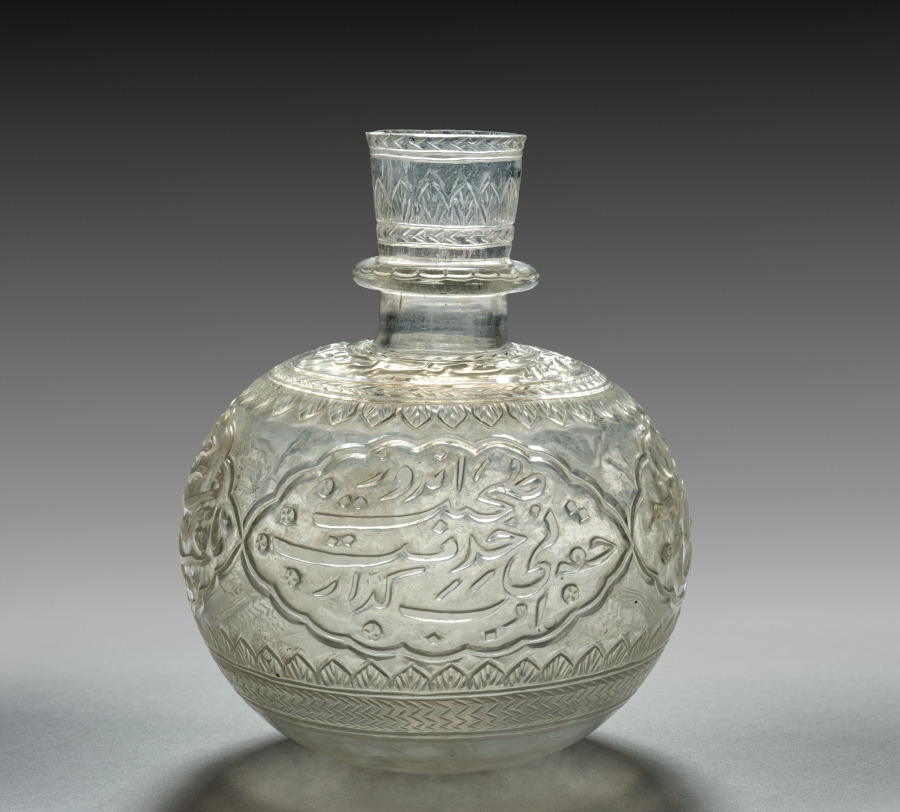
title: Hookah Bowl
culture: India, Mughal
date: 1700s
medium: glass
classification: Glass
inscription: Inscription in Farsi, on body: Even if live charcoal is placed on its head/ The hookah, a teacher of etiquette,/ will not respond unless drawn upon;/ Thus one can learn from its manners of refinement.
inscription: Inscription in Farsi, on shoulder: In the name of Allah the clement and merciful is the key to the wise treasure.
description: The inscription around the body of the base speaks to the use of the hookah in the decadent life of the Mughal court. The hookah is commended for being a proper, refined servant who will not “respond unless drawn upon” or, produce water bubbles when smoke is drawn through the hose. Undoubtedly the witty, poetic allusions would have been appreciated at banquets and other courtly gatherings. The use of wheel-cut glass for this hookah base may have been influenced by English glass and lead crystal that was exported to India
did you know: Around the top of this hookah bowl are incised the opening two lines from the Khamsa (Quintet) of the celebrated Persian poet Nizami (1141–1209).